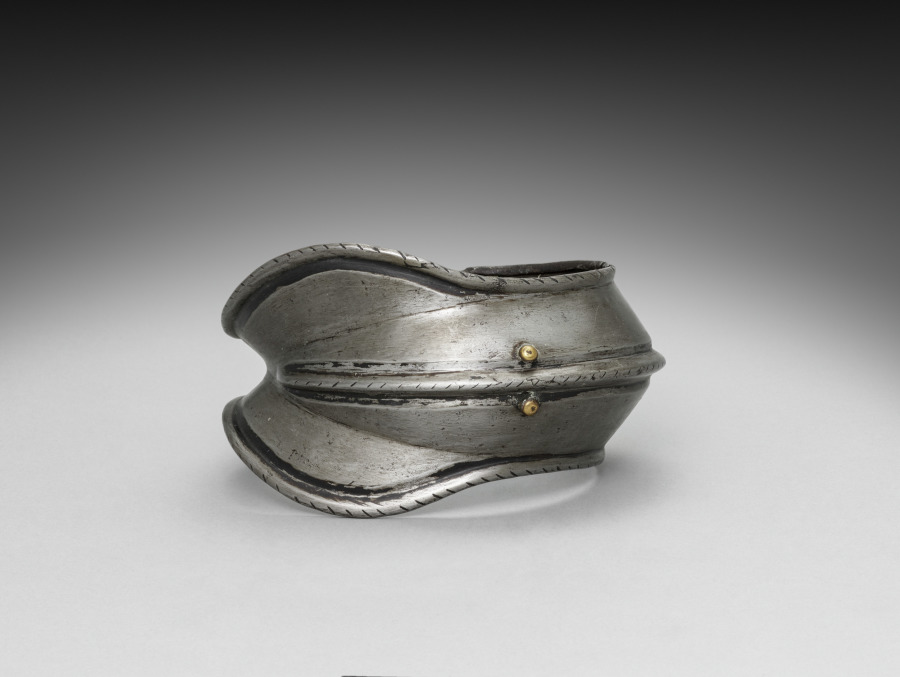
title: Knee Cap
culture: Germany, 19th century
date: 1801–1900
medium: steel with black paint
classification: Arms and Armor